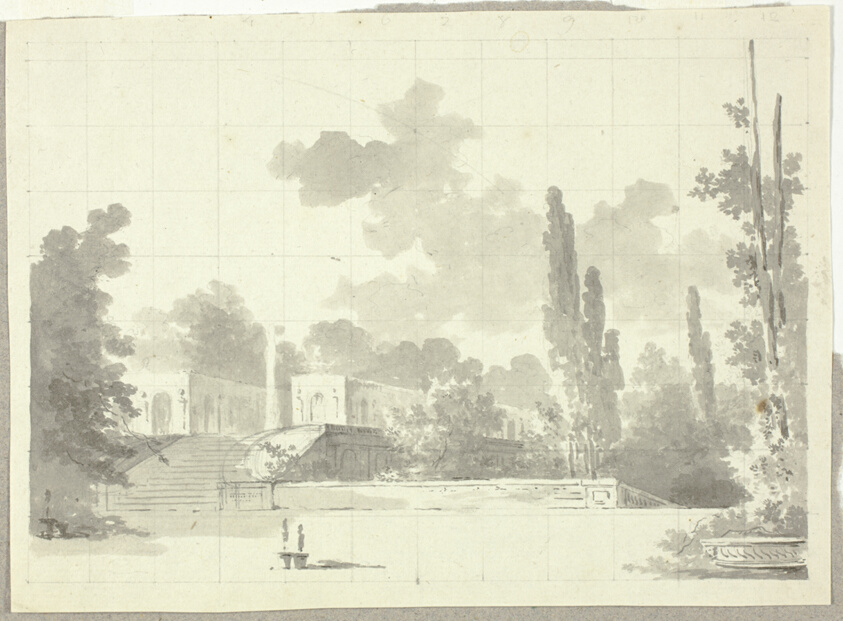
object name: Drawing and Watercolor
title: View of the Park at Versailles: Stairway to Terrace with Temple and Column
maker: Pierre Antoine Mongin (French, 1761/62-1824/27)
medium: Brush and gray wash, with graphite, on cream laid paper squared in graphite for transfer, tipped on gray wove paper with pink and blue fibers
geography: France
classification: ink or chalk wash; drawings (visual works); prints and drawing